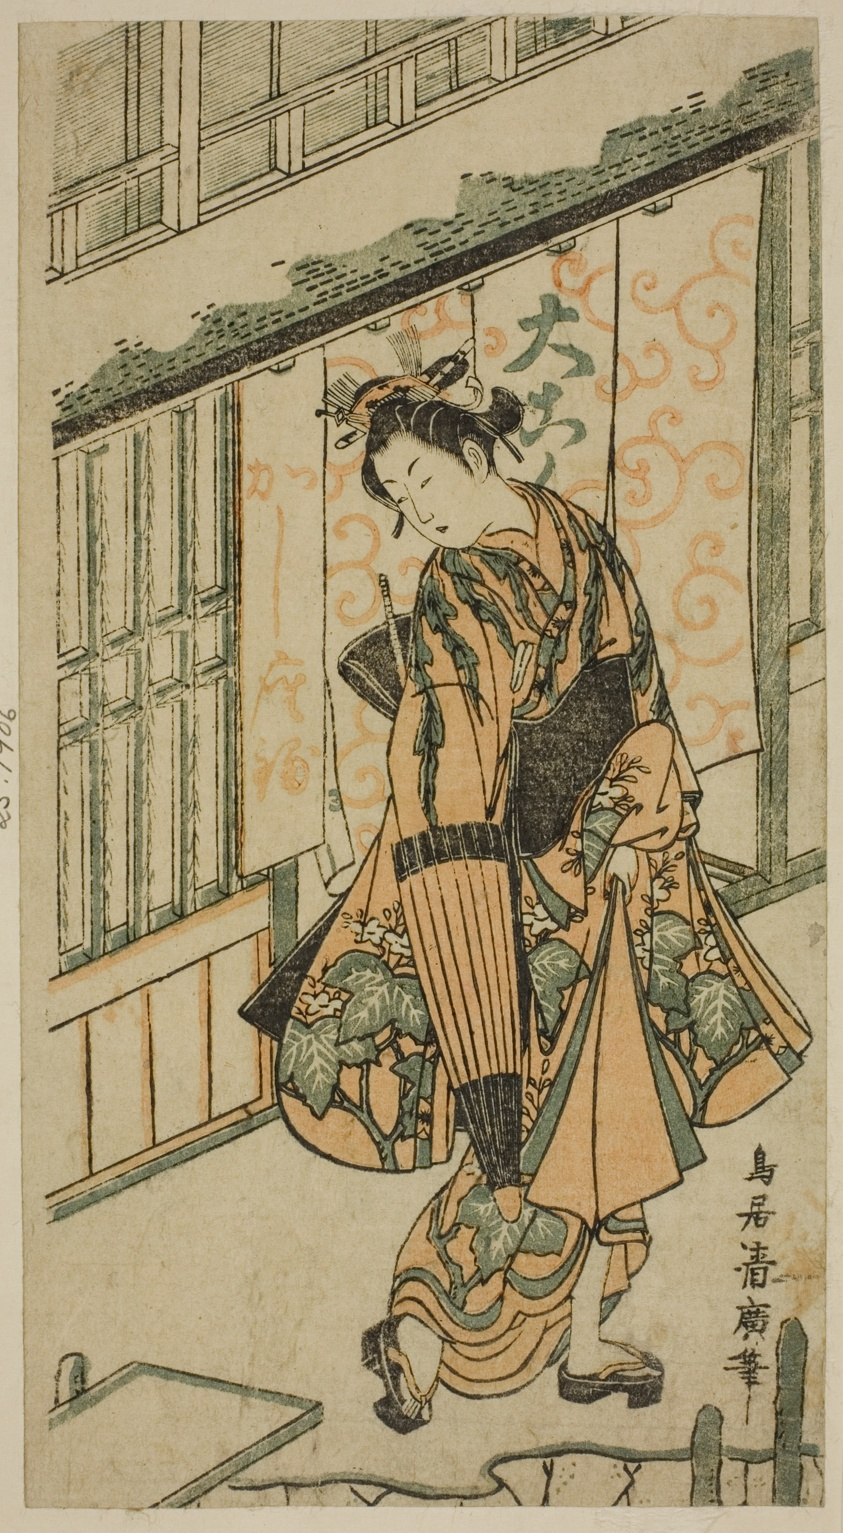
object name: Print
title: Young Woman Holding an Umbrella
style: Japanese (culture or style)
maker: Torii Kiyohiro (Japanese, active c. 1737-76)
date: c. 1750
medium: Color woodblock print; hosoban, benizuri-e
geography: Japan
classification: woodblock print; print; asian art